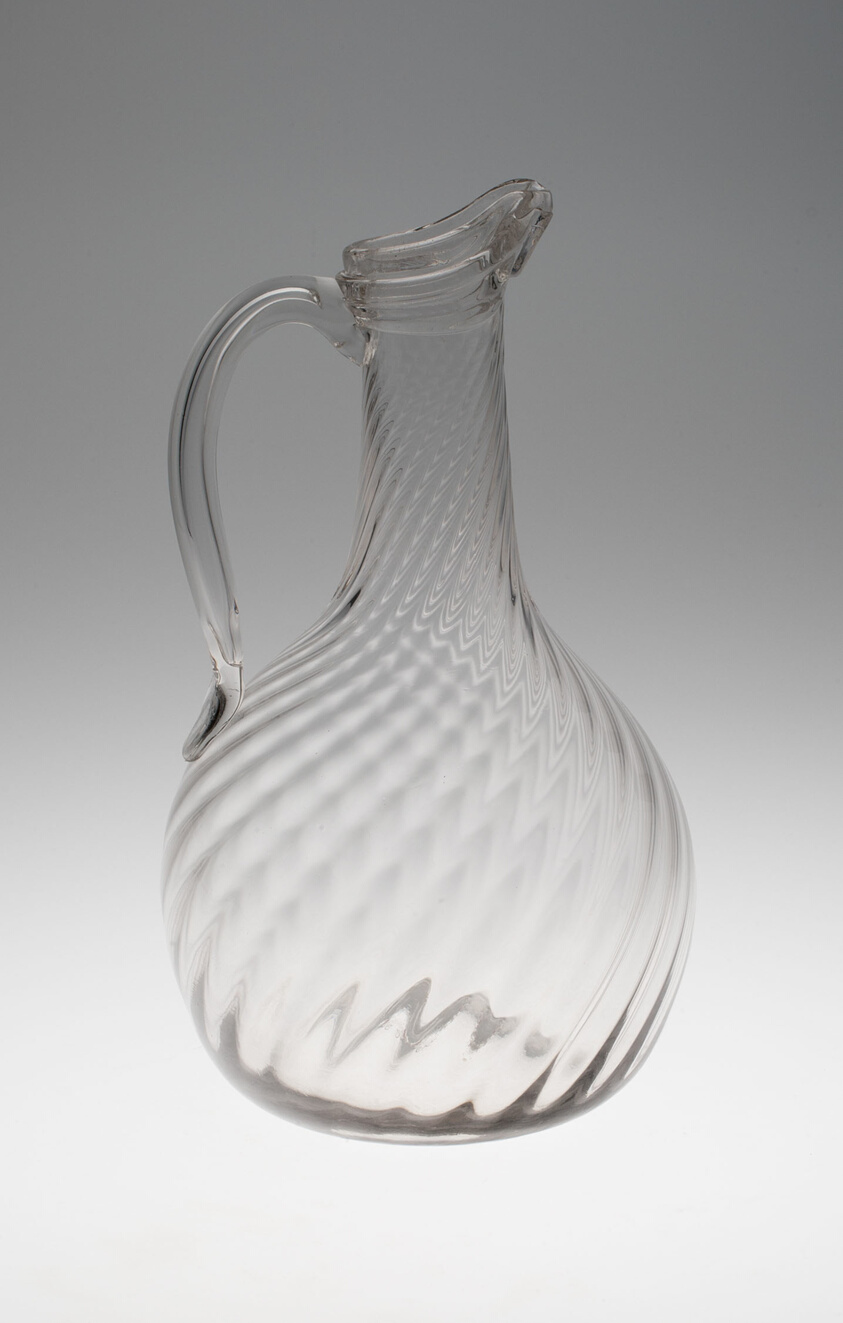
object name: Glass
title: Carafe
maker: Possibly Normandy, France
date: 18th century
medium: Glass; non-lead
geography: France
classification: glass